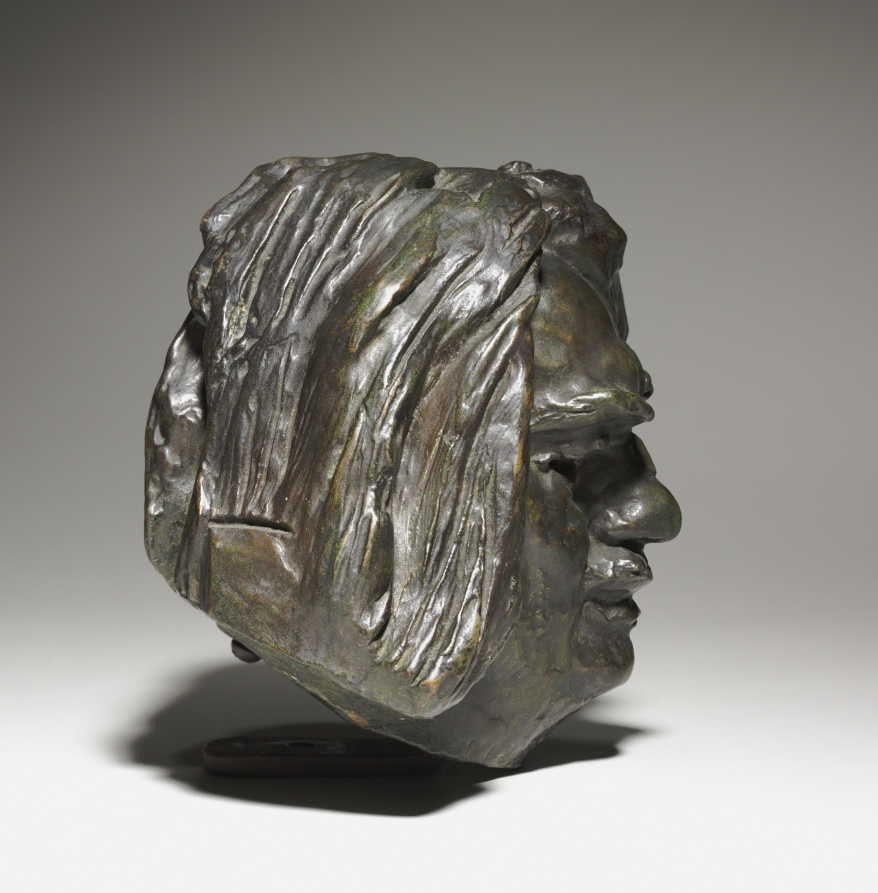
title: Study for the Head of the Monument to Honoré de Balzac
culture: France, late 19th-early 20th Century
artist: Auguste Rodin (French, 1840–1917)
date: 1893–1897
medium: bronze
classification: Sculpture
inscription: Signed on hair to right: "A. Rodin"